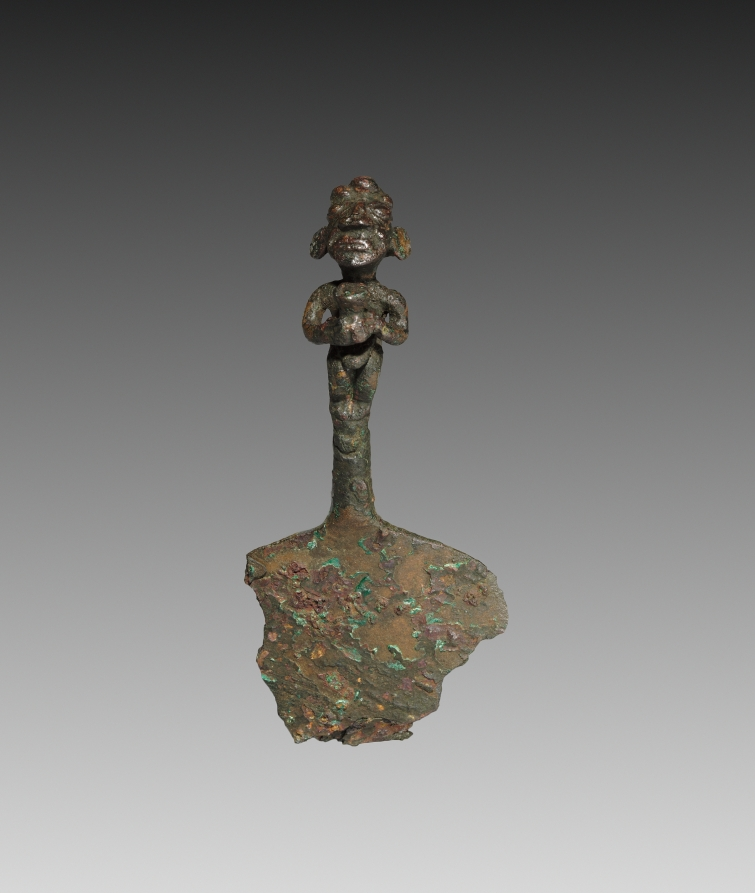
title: Knife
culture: Peru, Inca Culture, 15th-16th century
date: 1400s-1500s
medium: bronze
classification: Metalwork